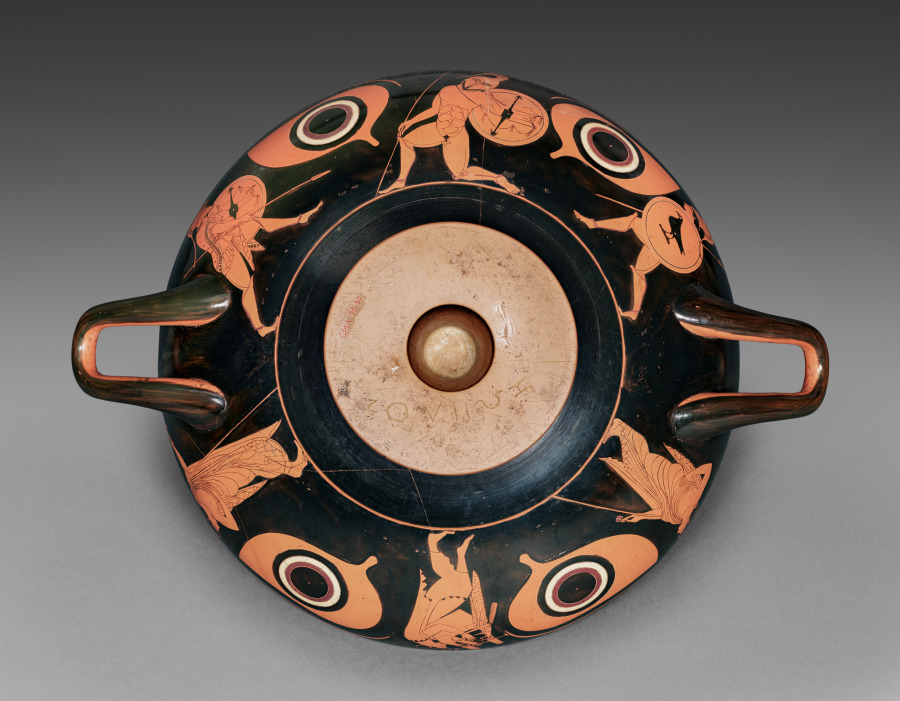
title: Red-Figure Eye Cup: Warriors (A), Musician and Youths (B)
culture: Greek, Attic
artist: attributed to Psiax (Greek, Attic, active c. 525–505 BCE)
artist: and Group of Leipzig T 3599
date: c. 520 BCE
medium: ceramic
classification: Ceramic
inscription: Graffito on underside of foot: Ζωιιλος [ZOILOS, perhaps the name of an owner]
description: Red-figure eye cups, like their more common black-figure brethren (including one in Cleveland), feature two large eyes on either side, producing a masking effect for drinkers. Typically, palmettes flank the eyes, with either a nose or figure at center. Here, the innovative painter Psiax, who worked in both black-figure and red-figure, moved the palmettes to the tondo and created three-figure compositions on each exterior side: two warriors converging on a fallen comrade (or enemy); and a youth playing a cithara for an audience of two. The experimental nature of early red-figure may explain the unusual spear and awkwardly twisted torso and lower leg of the central warrior.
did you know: The fallen warrior’s spear is done with added clay (shaft) and incision (head), not red-figure.